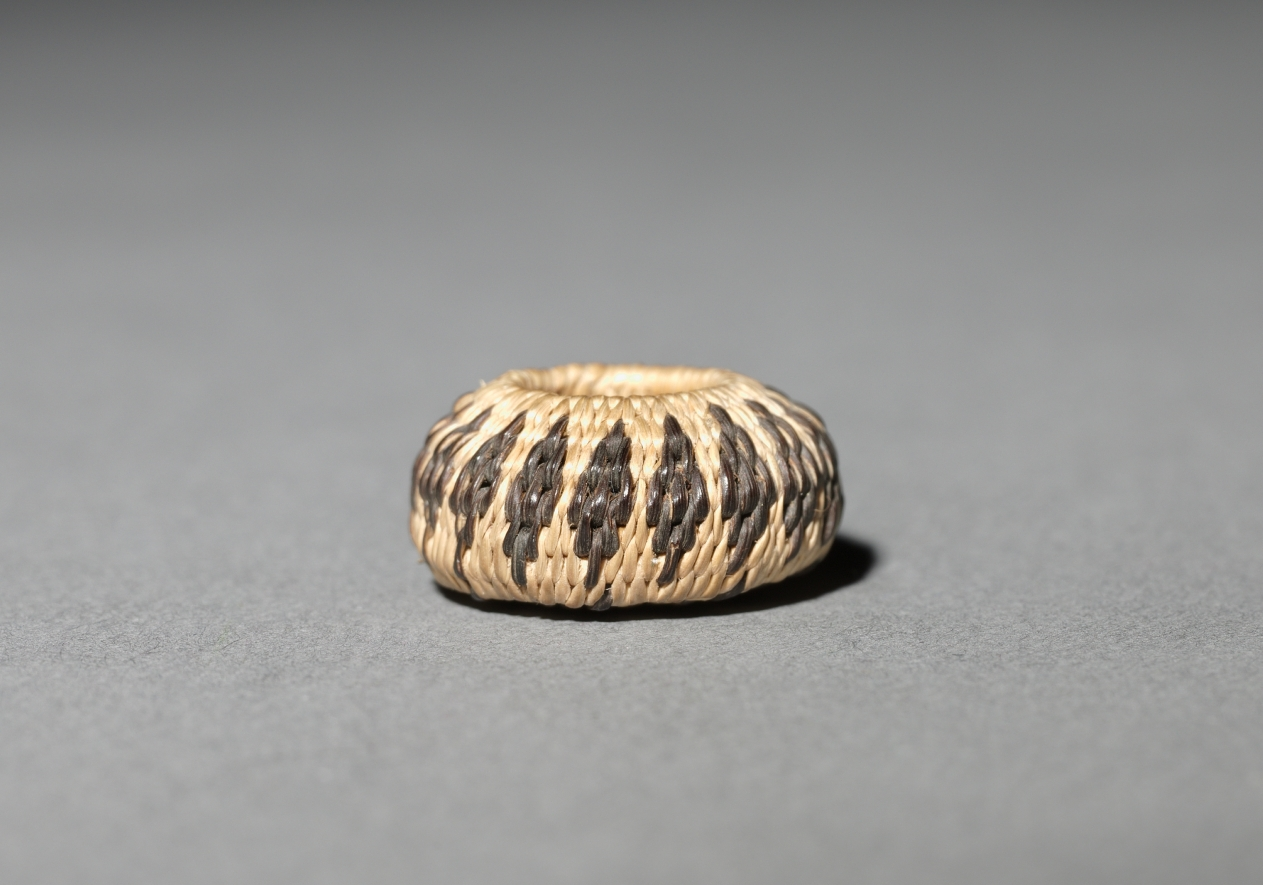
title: Miniature Round Basket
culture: California, Pomo, late 19th-early 20th century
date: late 1800s-early 1900s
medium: plant materials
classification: Basketry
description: Miniature baskets were made to demonstrate the basket-maker’s virtuoso skill, and these tiny marvels seem to be no exception—the smallest are just a few millimeters wide but still patterned. For such fine work, dexterity was required as much for preparation of materials as for weaving.